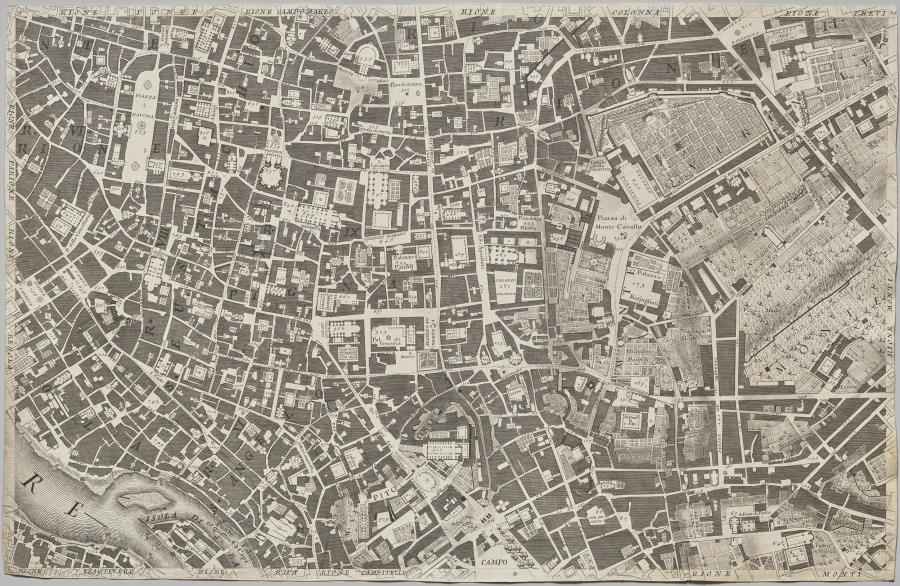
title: Nuova pianta di Roma data in luce da Giambattista Nolli l’anno MDCCXLVII, known as La Pianta Grande di Roma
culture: Italy, 18th century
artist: Giovanni Battista Nolli (Italian, 1701–1756)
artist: Carlo Nolli (Italian, 1690–1790)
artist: Rocco Pozzi (Italian, 1701–1774)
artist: Pietro Campana de Soriano (Italian, 1725–c. 1779)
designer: Stefano Pozzi (Italian, 1699–1768)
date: 1748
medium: etching and engraving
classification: Print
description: The monumental Pianta Grande di Roma, or Large Plan of Rome, which measures about 5 x 7 feet when its twelve plates are assembled, is a landmark in both cartography and printmaking. The map is considered the first scientific rendering of Rome, establishing new standards of accuracy and thoroughness when it was published in 1748. Devised by the Lombard architect and surveyor Giovanni Battista Nolli (Italian, 1701-56), the creation of the map required over ten years of surveying the city carried out by Nolli and a team of assistants with the help of new measuring devices. In Nolli’s “ichnographic” (also called “ground”) plan, architectural features and the urban infrastructure are reduced to a single horizontal slice, a minutely detailed footprint that conveys dimensions, proportions, and orientations to scale with the utmost clarity.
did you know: To make this map, Pope Clement XII granted the mapmaker permission to measure courtyards and other interior, inaccessible spaces in monastic communities, even those in nuns’ convents, which was controversial at the time.